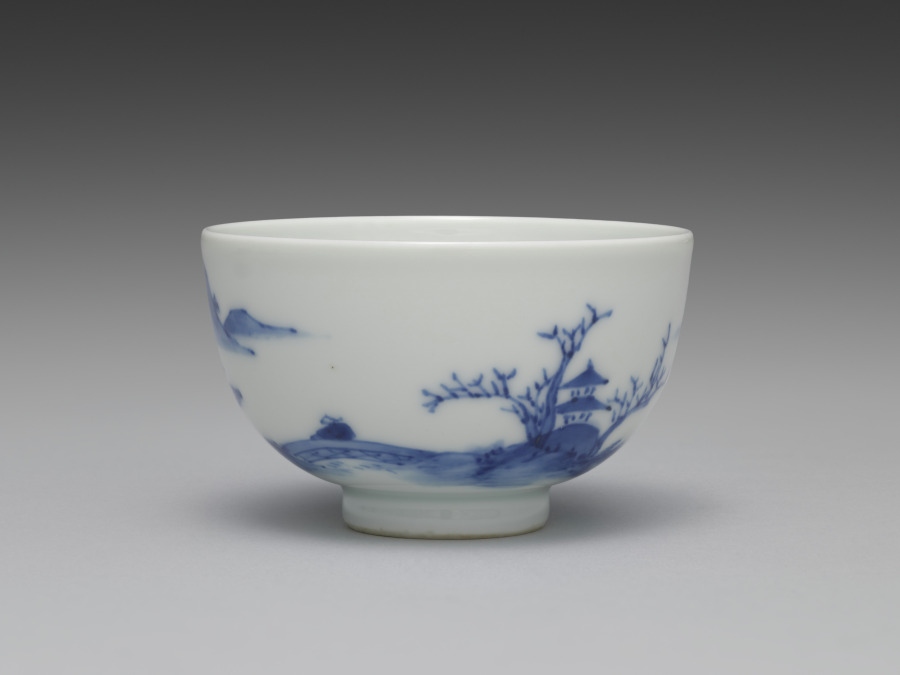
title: Teacup from Tea Set with Chinese Landscape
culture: Japan, Meiji period (1868–1912)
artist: Seifū Yohei III (Japanese, 1851–1914)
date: c. 1893–1914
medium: Porcelain with underglaze blue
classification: Ceramic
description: The theme of this sencha tea set is the Chinese scholar-recluse in an idyllic landscape. Each of the five teacups has a landscape with an architectural structure and some human activity. This tea set has a side-handled pot called a kyūsu, used for steeping, straining, and serving tea. Unlike some others, this set also has a yuzamashi, a container used to cool boiled water to just the right temperature for the best flavor when steeping. Seifū Yohei III’s painting teacher, Tanomura Chokunyū (1814–1907), made a visual record of famous sencha events that shows how these kinds of porcelains fit with objects such as a stove and kettle to form a complete set of utensils for tea preparation, and with ensembles of decorative objects meant to inspire creativity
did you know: A fourth cup shows a humbly dressed man with a broad-brimmed hat lugging a package tied to the end of a rod slung over his shoulder. In front of him is a two-story building flanked by deciduous trees and a man resting against the side of a sturdy stone bridge as he looks at a residence, or perhaps a set of roofed gates, further up the path.